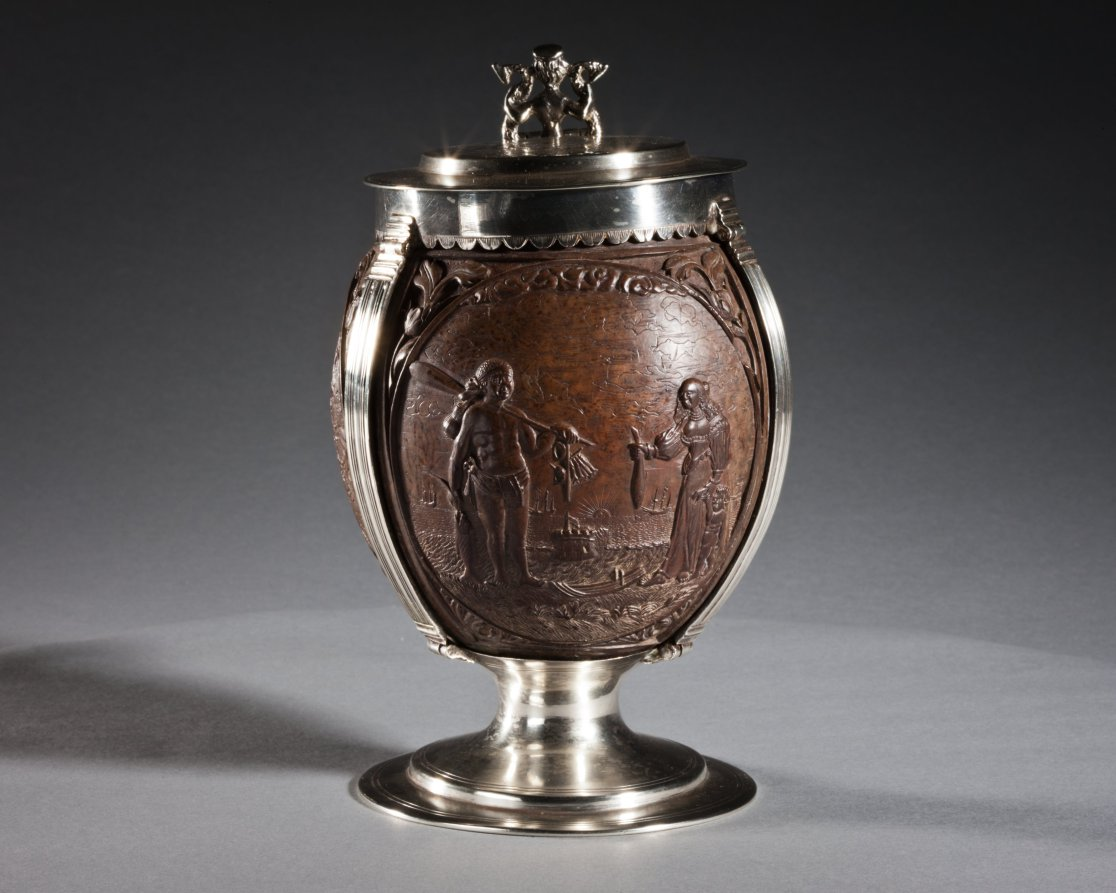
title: Coconut Cup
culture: carved coconut, probably The Netherlands; silver mount, probably England, 17th century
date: c. 1630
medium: carved coconut in silver mount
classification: Metalwork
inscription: top lid has engraved coat-of-arms, underside of lid has inscription: George Lewis TIVERTON Feby, 1st 1760.